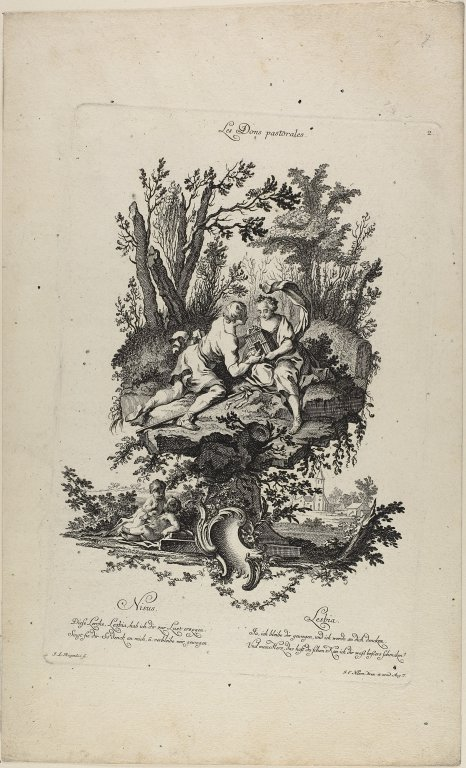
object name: Print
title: Pastoral Gifts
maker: Johann Lorenz Rugendas I (German, 1730–1799); after Charles Eisen (French, 1720–1778)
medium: Etching on ivory laid paper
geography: Germany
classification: engraving; print; prints and drawing